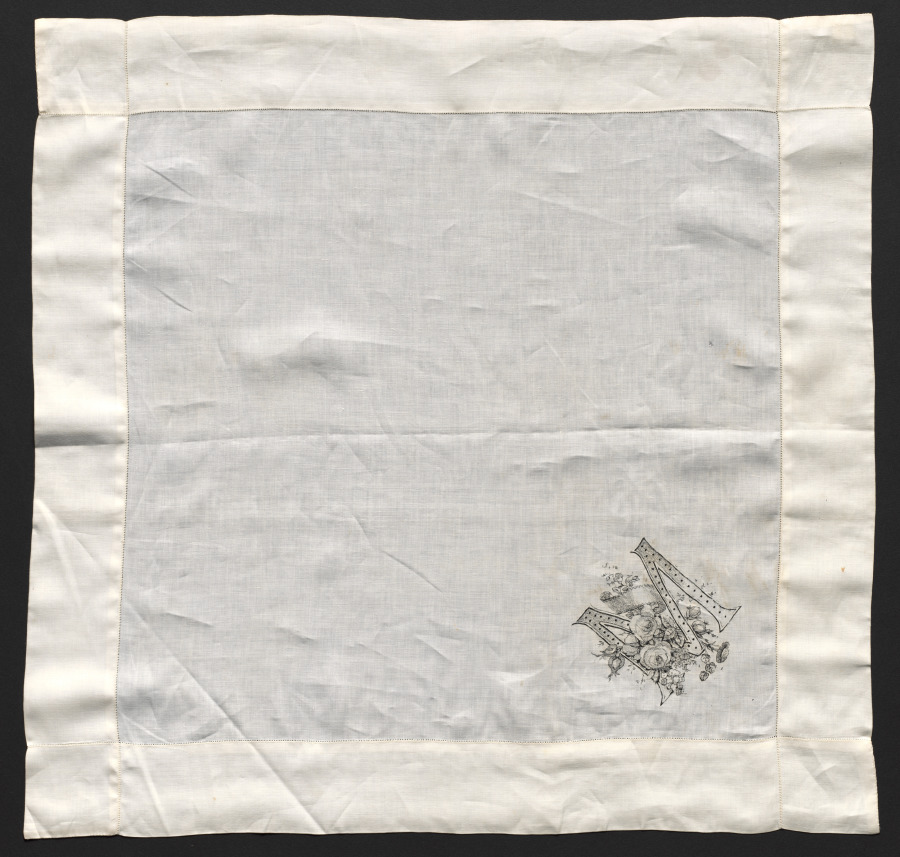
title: Embroidered Handkerchief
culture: Spain, Teneriffe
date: 1800s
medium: linen: embroidery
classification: Embroidery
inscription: embroidered in black in one corner, a large letter "M."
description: This handkerchief is monogrammed in black in one corner with the letter M.